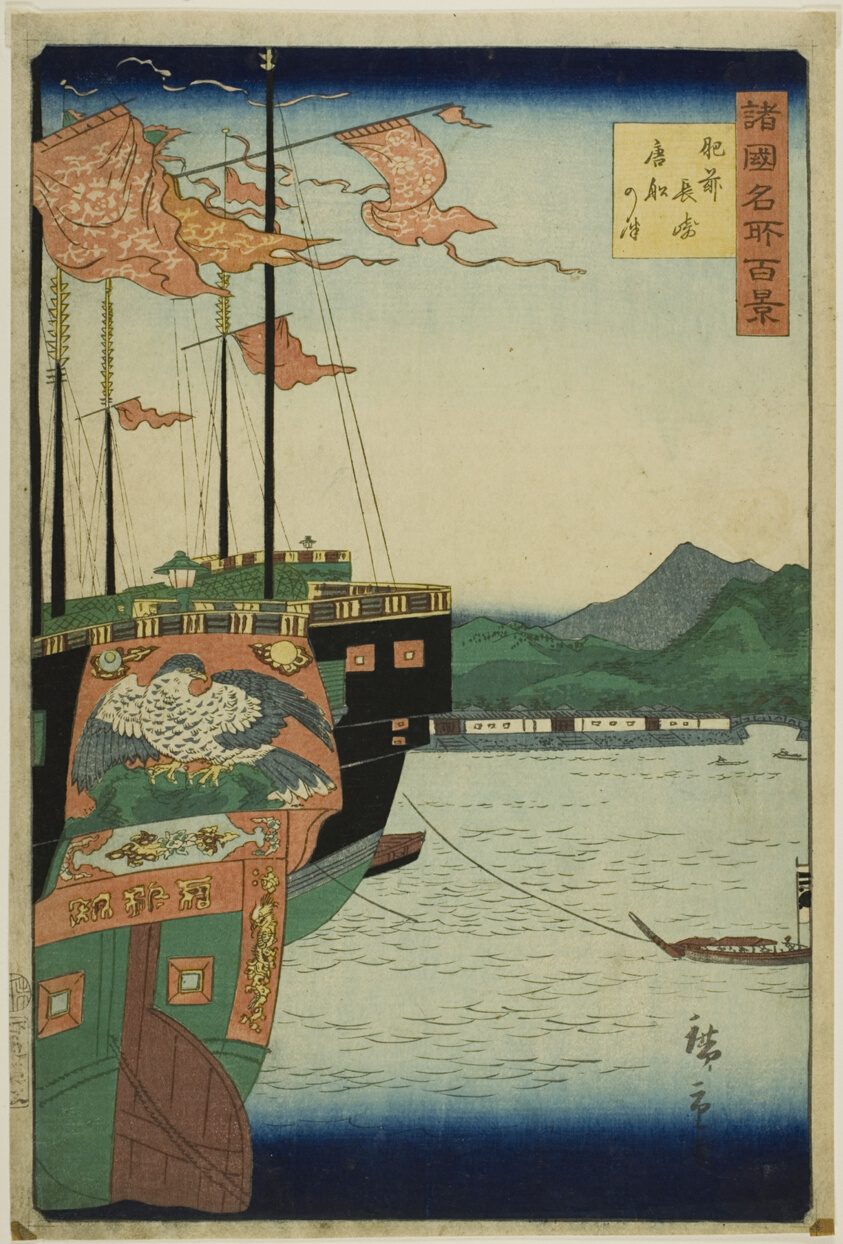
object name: Print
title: Harbor of Chinese Ships, Nagasaki, Hizen Province (Hizen Nagasaki karafune no zu) from the series “One Hundred Famous Views in the Various Provinces (Shokoku meisho hyakkei)”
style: Japanese (culture or style)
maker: Utagawa Hiroshige II (Shigenobu) (Japanese, 1826–1869)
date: 1859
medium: Color woodblock print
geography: Japan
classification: woodblock print; print